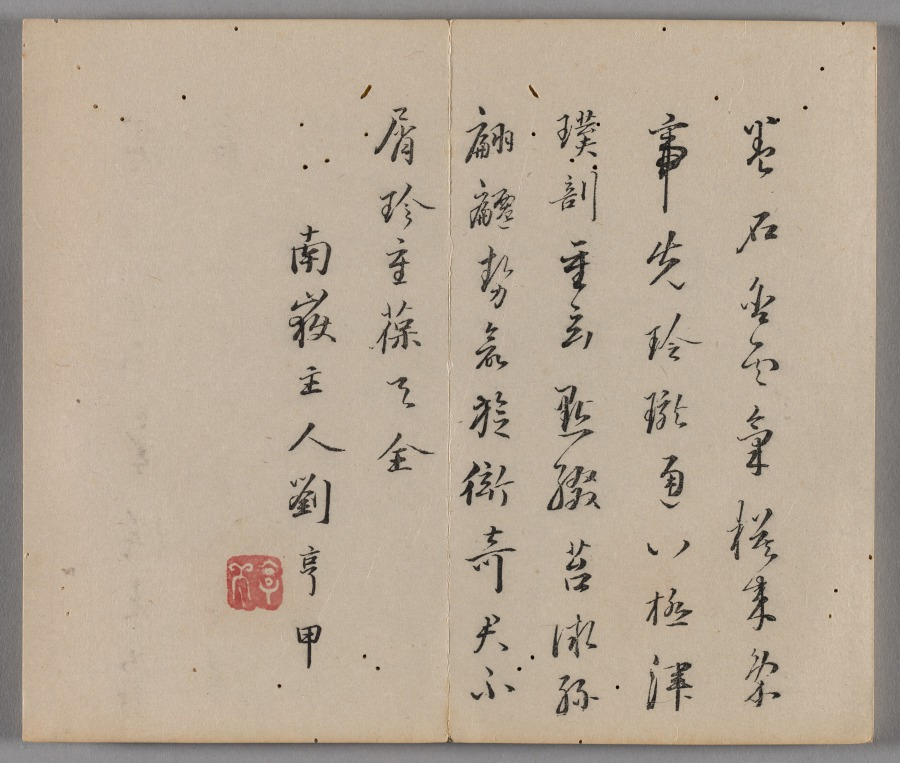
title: Ten Bamboo Studio Painting and Calligraphy Handbook (Shizhuzhai shuhua pu): Rocks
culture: China, Qing dynasty (1644-1911)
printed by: Hu Zhengyan (Chinese, c. 1584–1674)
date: 1633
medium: Woodblock-printed book; ink and colors on paper; first edition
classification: Print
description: Color printing reached a level of perfection in the early 1600s, as seen in this Ten Bamboo Studio Collection of Calligraphy and Painting and the Mustard Seed Garden Manual of Painting (printed 1679 and 1701). The painterly quality, precision in registering (aligning) the woodblocks, and harmonious colors made them the most successful color print editions in Chinese history. Both editions were printed and compiled in Nanjing, spread nationwide, and had a great impact on the arts in Japan and Korea.